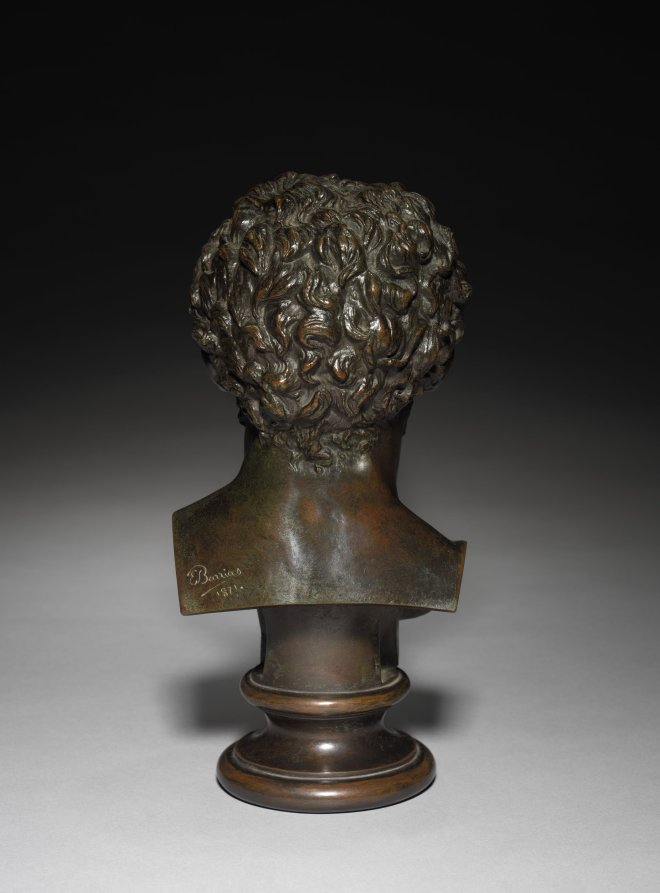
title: Henri Regnault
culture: France, 19th century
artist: Louis-Ernest Barrias (French, 1841–1905)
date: 1871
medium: bronze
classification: Sculpture